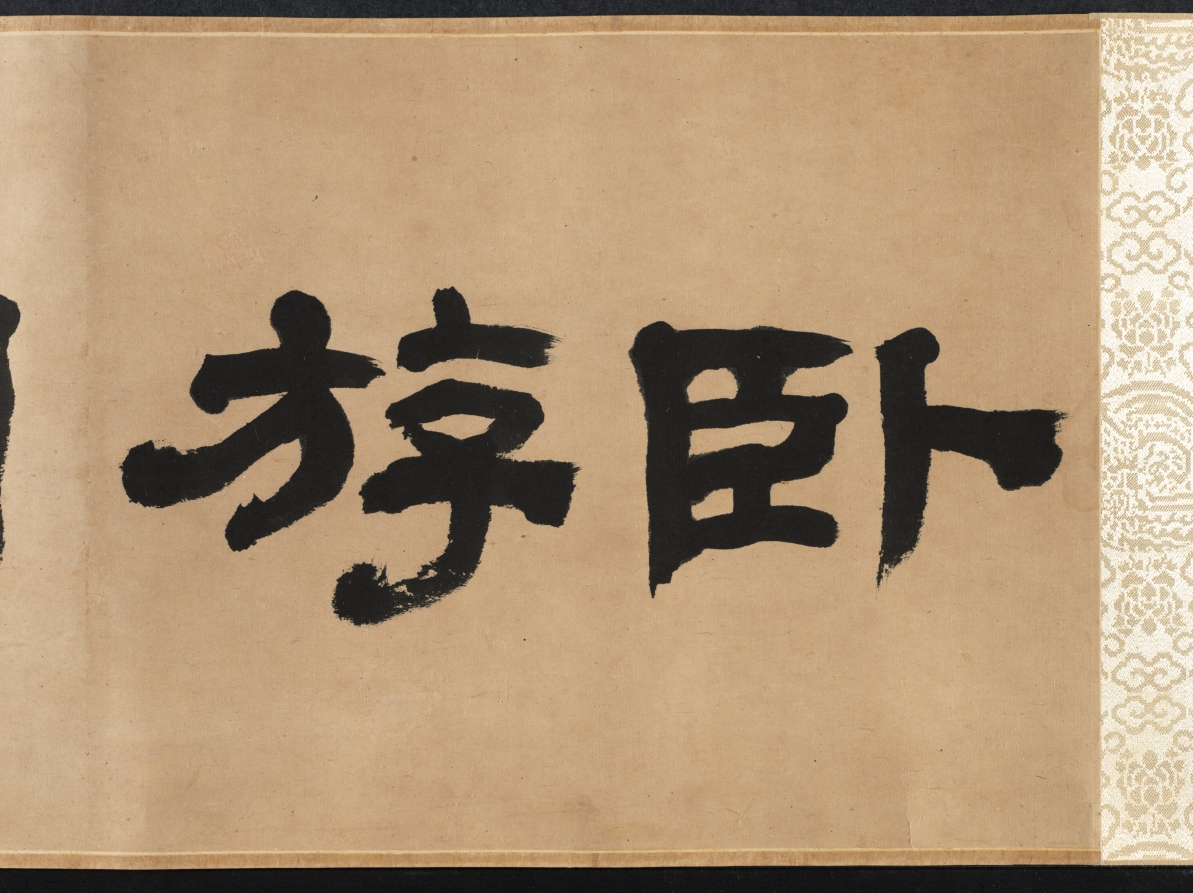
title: Dream Journey among Rivers and Mountains, no. 90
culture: China, Qing dynasty (1644-1911)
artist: Cheng Zhengkui (Chinese, 1604–1676)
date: 1658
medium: Handscroll; ink and color on paper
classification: Painting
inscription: 江山臥遊圖其九十, 青溪道人, 戊戌夏五。 [印] 程正揆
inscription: Title and inscription by Huang Yi 黃易 (1744–1802), and 3 seals.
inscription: 1 colophon and 9 additional seals: 3 seals of Dai Zhi 戴植 (active about 1821–1850); 1 colophon, dated 1914, and 3 seals of Yan Shiqing 顏世清 (1873–1929); 3 seals of Wang Nanping 王南屏 (1924–1985).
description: Cliffs and waterfalls interspersed with trees and dotted vegetation are spread over this handscroll. Long paths wind their way through villages, beside cottages, shrines, and over bridges. In the past, Chinese literati officials liked to take a “dream journey” along mountains and rivers when viewing landscape paintings in their studios. Scenery of this kind thus became a way to escape from the world of bureaucracy and administration. The painter Cheng Zhengkui used the title “Dream Journey” for a whole series of paintings, of which this is number 90. He is said to have painted 500 of them, but the actual count remains unknown.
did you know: Cheng Zhengkui planned to make 100 dream journey paintings but may have ultimately made 500.